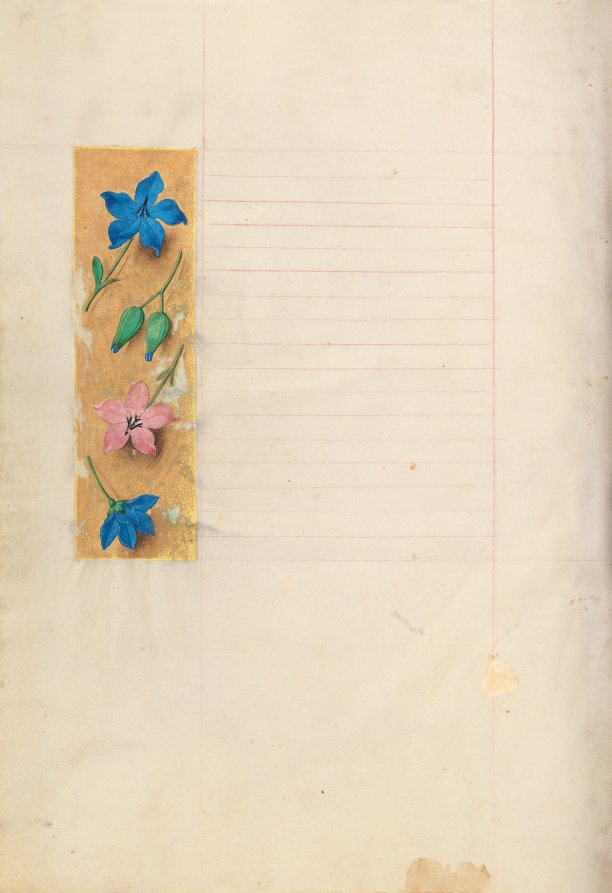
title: Hours of Queen Isabella the Catholic, Queen of Spain: Fol. 279v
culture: Flanders, Ghent and Bruges, late 15th century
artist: Master of the First Prayerbook of Maximillian (Flemish, c. 1444–1519)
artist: and Associates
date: c. 1500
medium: ink, tempera, and gold on vellum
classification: Bound Volume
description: This manuscript was illuminated by a circle of at least five highly organized manuscript painters active in the Flemish cities of Ghent and Bruges. The principal illuminator was Alexander Bening, who painted the majority of the book's miniatures. Manuscripts produced by this circle of artists are renowned for the decoration of their borders, which typically feature a rich variety of realistically-painted flowers, birds, and butterflies. This prayer book, called a book of hours, was intended not for a cleric, but for the private devotions of a lay person-in this case, Isabella the Catholic, Queen of Spain (1451-1504). Isabella's coat of arms embellishes the book's frontispiece. It is unlikely that the book was commissioned by the Queen herself; rather, she probably received it as a diplomatic gift from someone courting her patronage, perhaps Cardinal Francisco Jimenez de Cisneros. A Franciscan friar, Jimenez was dependent upon Isabella for his advancement, first to the post of Queen's confessor in 1492, and then to Archbishop of Toledo in 1495.